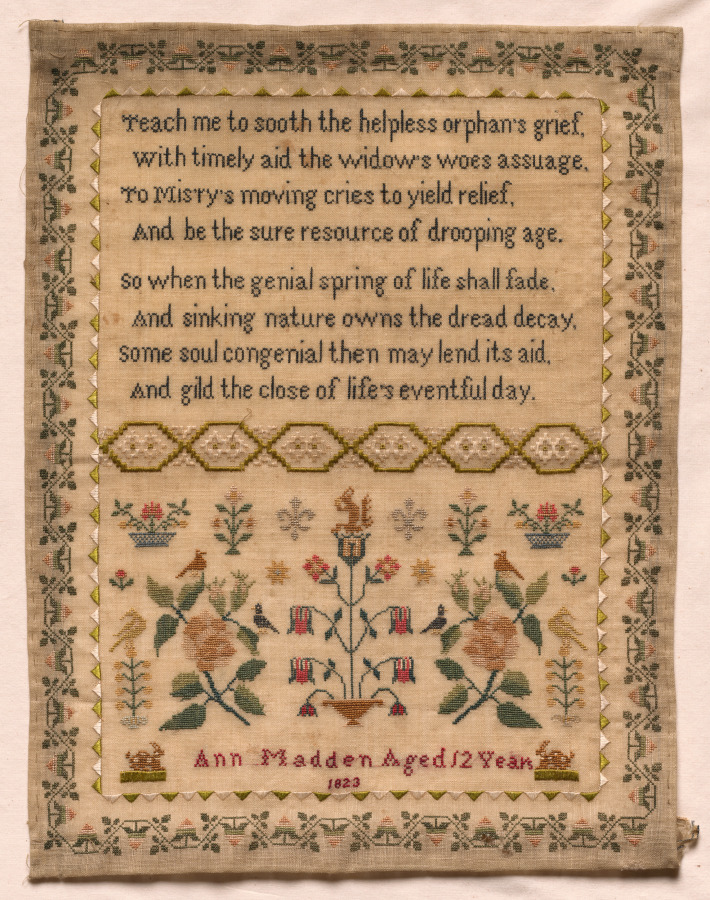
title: Sampler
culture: England, early 19th century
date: 1823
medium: embroidery; silk on woolen canvas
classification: Sampler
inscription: above: "Teach me to sooth the helpless orphan's grief,/ with timely aid the widow's woes assuage./ To Misry's moving cries to yield relief,/ And be the sure resource of drooping age./ So when the genial spring of life shall fade,/ And sinking nature owns the dread decay,/ Some soul congenial then may lend its aid,/ And gild the close of life's eventful day."; below: "Ann Madden Aged 12 Years/ 1823."